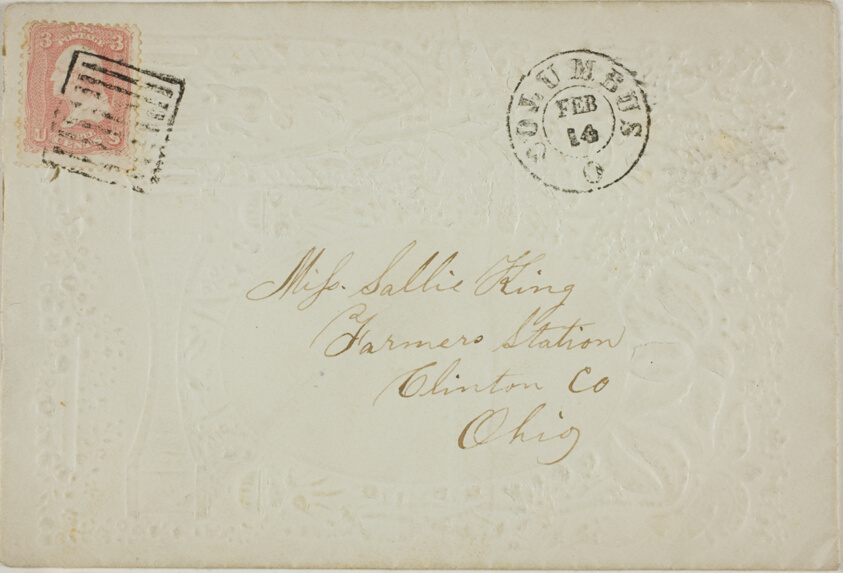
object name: Print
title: Valentine envelope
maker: Unknown Artist; English, 19th century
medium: Pen and brown ink on embossed ivory wove paper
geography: England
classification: valentine; prints and drawing; print